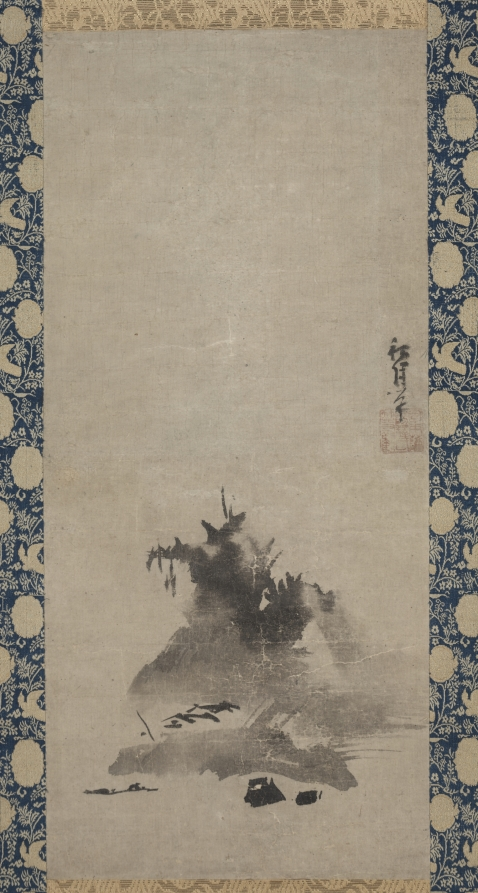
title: Haboku (Flung-ink) Landscape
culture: Japan, Muromachi period (1392–1573)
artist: Shūgetsu Tōkan (Japanese, 1440?-1529)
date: c. 1510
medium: hanging scroll; ink on paper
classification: Painting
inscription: signed middle right edge: "Shugetsu hitsu." One seal which reads "Nihon satsuyo shakushi Tokan."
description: This vague but energetically rendered landscape highlights the brush: the messenger for a moment’s emotional or spiritual state. The painting represents one of many subjects and styles Shugetsu studied and absorbed from the great practitioners of Ming-dynasty China in the late 1400s and early 1500s. The technique of "flung ink," or haboku, disguises purposeful composition as an almost random, distracted series of brushstrokes. Close inspection reveals tonalities and strokes brushed onto a soft, absorbent paper in a range from heavy and wet to crisp ink charges. Not surprisingly, amateur and professional Zen monk-painters favored this "impressionistic" style as an exercise in seeing meaningful detail slowly emerge from what at first seems unclear.